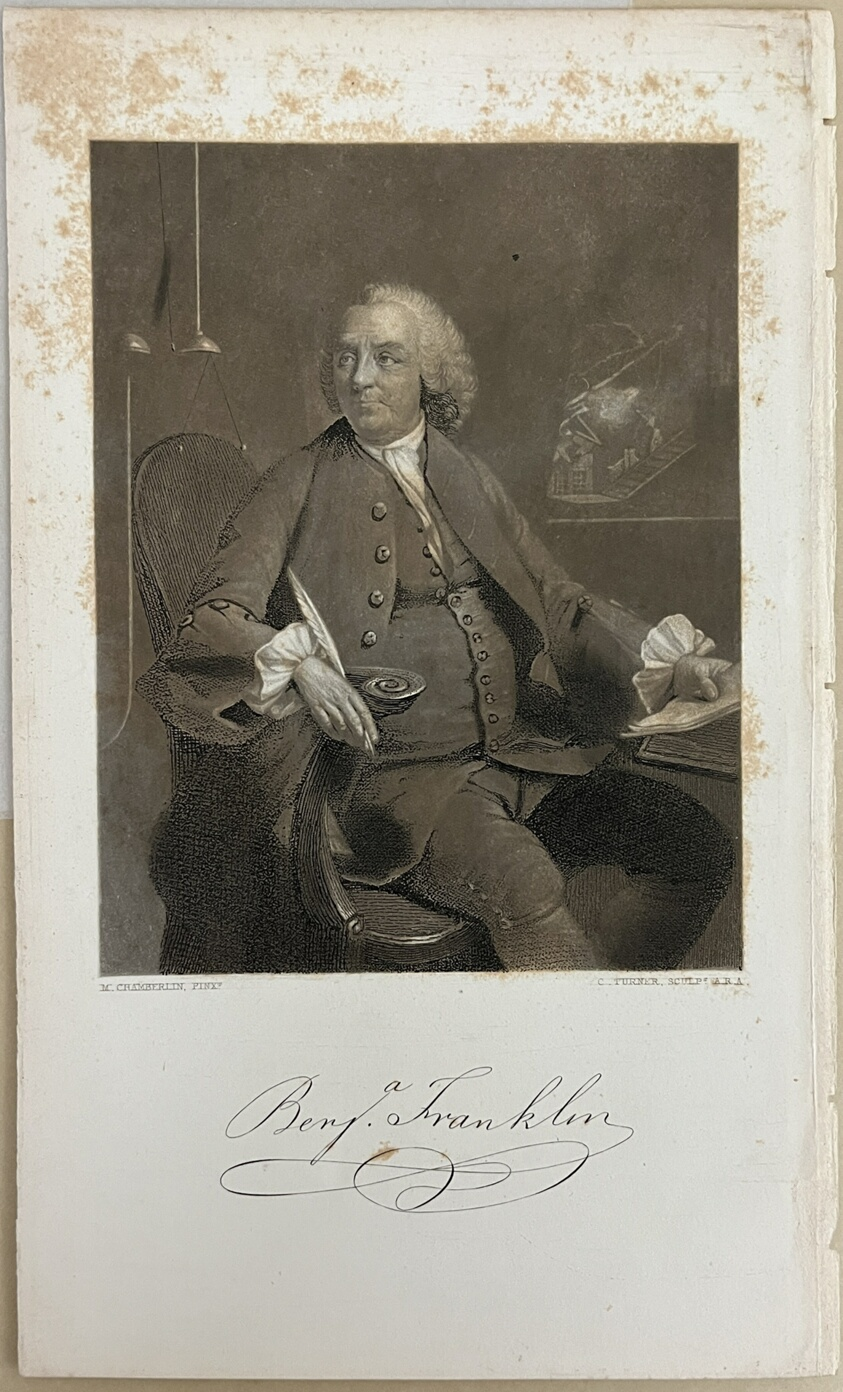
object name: Print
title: Benjamin Franklin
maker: Charles Turner (English, 1774-1857); after Mason Chamberlin (English, 1727-1787)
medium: Lithography on paper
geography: United Kingdom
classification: reproduction; print; prints and drawing